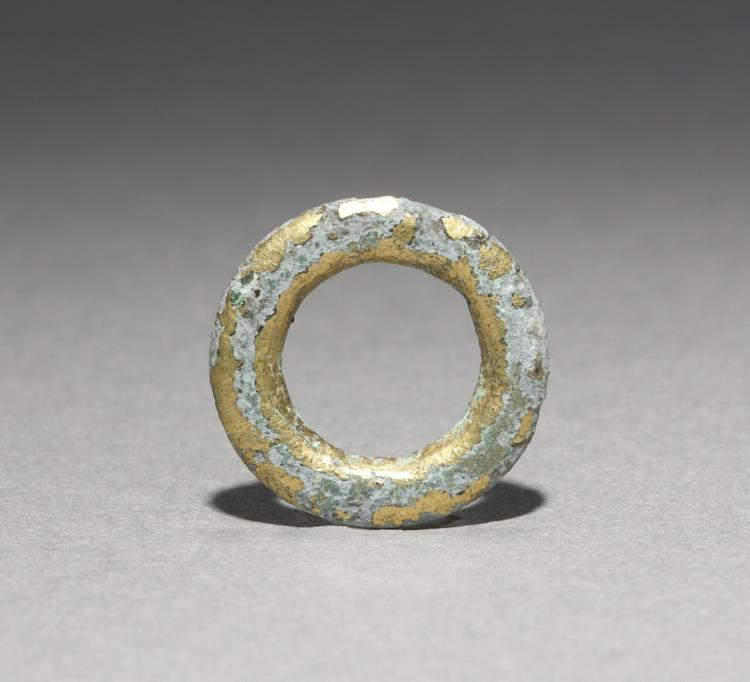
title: Ring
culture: Korea, Goryeo dynasty (918–1392)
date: 918–1392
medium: bronze gilt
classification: Metalwork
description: Both everyday objects and ornaments such as this ring were standard burial goods for the period. Furnishing tombs with an elaborate assemblage of objects was believed to honor and comfort the newly dead. Generally, Goryeo tombs were left untouched until the late 19th century. During the colonial period (1910–45), however, Japanese archaeologists aggressively excavated the tombs located in Kaeseong, the former capital of the Goryeo period. It's highly possible this bronze ring came from one of those excavated tomb sites.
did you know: The Japanese antique dealer Yamanaka & Company, which opened its branches in New York (1895) and Boston (1899), sold small Korean archaeological materials such as this bronze ring to American collectors in the early 20th century.